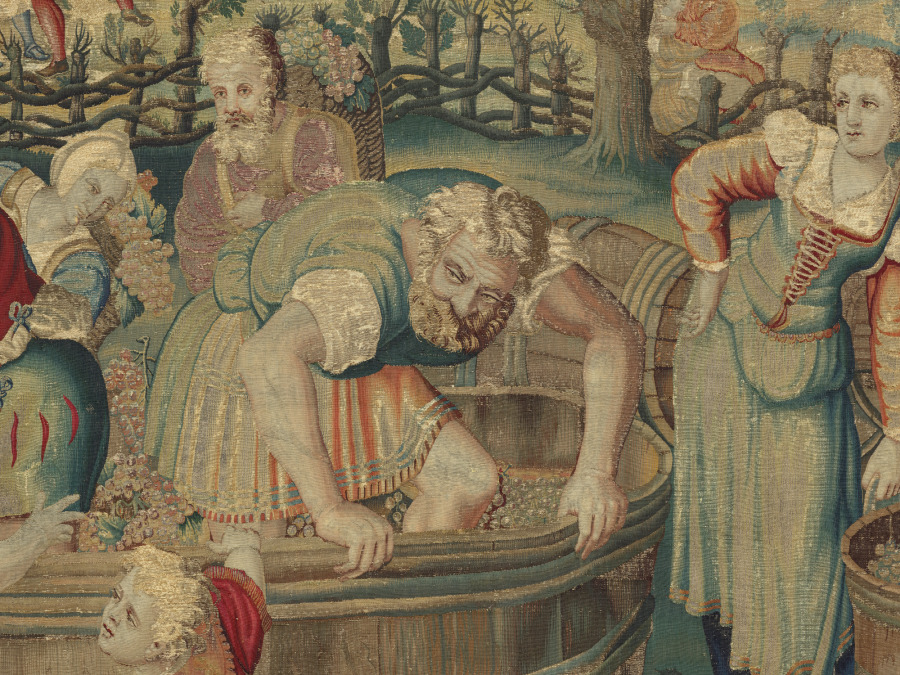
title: Autumn: Vintage Scene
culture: France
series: Four Seasons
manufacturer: possibly by Gobelins Manufactory (France, Paris, est. 1662)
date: designed c. 1535, woven mid- to late 1600s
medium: Wool, silk, and gold filé: tapestry weave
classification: Tapestry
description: In 16th-century Europe, the grape harvest took place in autumn, a tradition that persists among vintners to this day. Here, men and women gather grapes in buckets and drop them into an enormous wood vat. Two men stomp on the ripe grapes, squeezing out the juice. A man on the far right pours the juice into barrels, where it will ferment into wine. Children sleep or play in the foreground; one mischievous toddler presses grape juice into the mouth of another small child. In the distance four couples dance to music provided by a bagpiper, who is perched in a tree.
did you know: Originally green, the plants were woven using yarn first dyed blue and then dyed yellow; over time the yellow dye has faded so that today the plants appear blue.